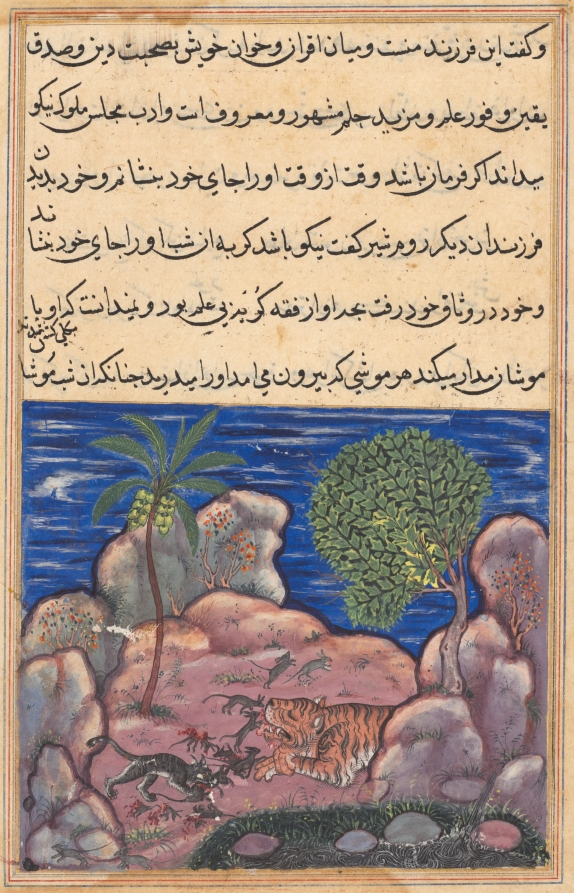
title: The cat attacks the mice which disturb the lion, from a Tuti-nama (Tales of a Parrot): Fifteenth Night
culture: India, Mughal court, 16th century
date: c. 1560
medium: gum tempera, ink, and gold on paper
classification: Painting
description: One day came when the cat brought one of his sons to substitute for him as guardian against the mice, so that he could have some time away to visit his other children. That night the young cat killed all of the mice, as shown in this painting, after which the lion had no need for a cat anymore and relieved him of his position as Magistrate of the Court. The text reads: "The cat said to his son, ‘The spark of this calamity was set by you, and the robe of this disaster was tailored by you. If you had not annihilated the mice and had not entirely relieved the lion’s heart of his grief, he would not have dismissed me.’ The young cat was filled with remorse for having killed the mice." By the time the parrot finished telling the story, daybreak came and it was too late for Khujasta to rendezvous with her lover under the cover of darkness.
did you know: The same anonymous artist completed all three pages in the story of the lion and the mice.